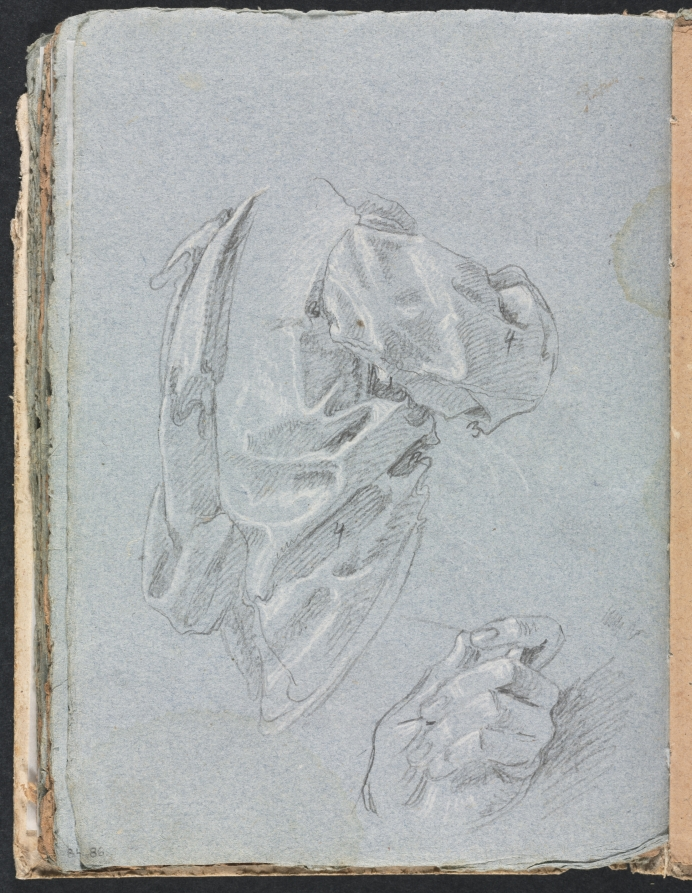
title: Verona Sketchbook: Drapery study with left hand (page 86)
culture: Italy, 18th century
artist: Francesco Lorenzi (Italian, 1723–1787)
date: 1760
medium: black chalk with white heightening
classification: Bound Volume